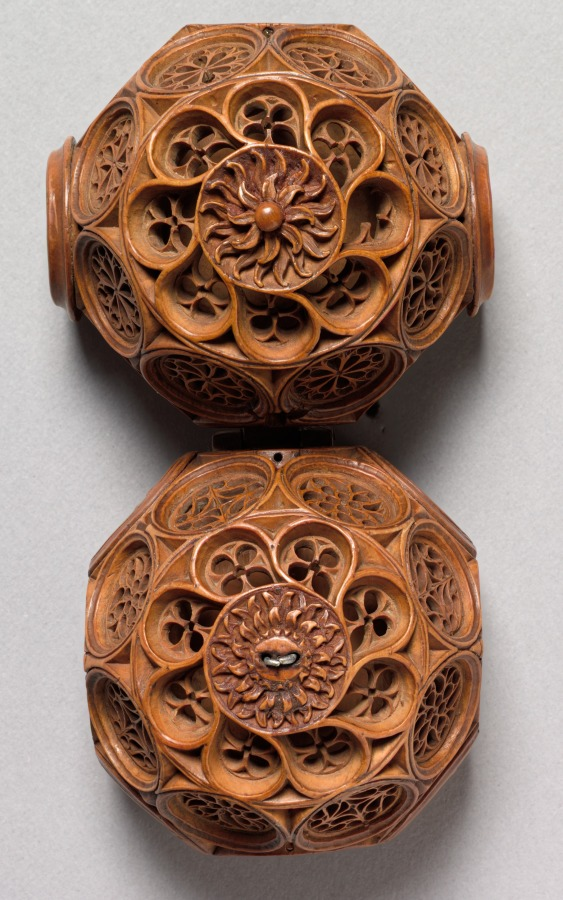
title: Prayer Nut with Scenes from the Life of St. James the Greater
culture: Northern Netherlands (Holland)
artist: Adam Dircksz (Netherlandish, active c. 1500)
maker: and Workshop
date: c. 1500–1530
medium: boxwood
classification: Sculpture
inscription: Interior around lower half: SANCTVS SACRILEGI STAT IVDICIS ANTE TRIBVNAL (Holiness stands before the throne of the profane judge)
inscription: Interior, around upper half: GAVDENS PRO CRISTO IACOBVS SVBDIT CAPVT ENSI (St James submits his head to the sword)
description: Prayer nuts are capsules that can be opened in half and were mainly worn from the end of the 1400s until 1530, particularly in the Netherlands. These objects are generally made from boxwood and carved with extreme refinement and delicacy. They often echo Gothic architecture and include openwork tracery or elaborate decorative patterns. Prayer nuts came into fashion for private devotion as a pendant on the rosary or on a decorative chain. The emergence of prayer nuts went hand in hand with the practice of praying the rosary more frequently at the end of the Middle Ages.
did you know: This miniature masterpiece was held and caressed within the palm of the holder as they prayed and meditated on their faith. What do you use to focus or engage in quiet concentration?